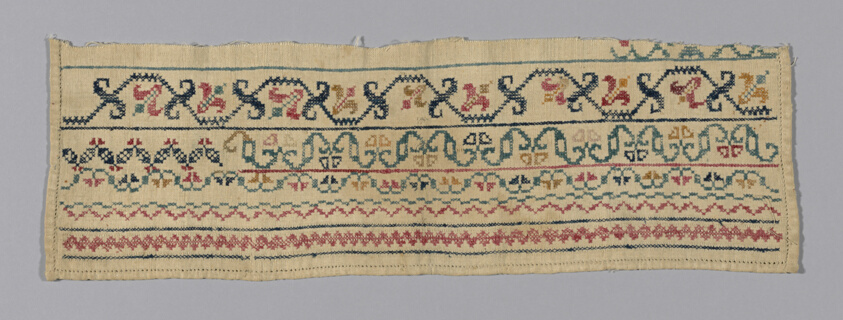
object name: Textile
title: Sampler Fragment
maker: United States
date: 19th century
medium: Linen, plain weave; cross stitch with hemstitched hem; top edge is cut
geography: United States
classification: textile; needlework (visual works); sampler